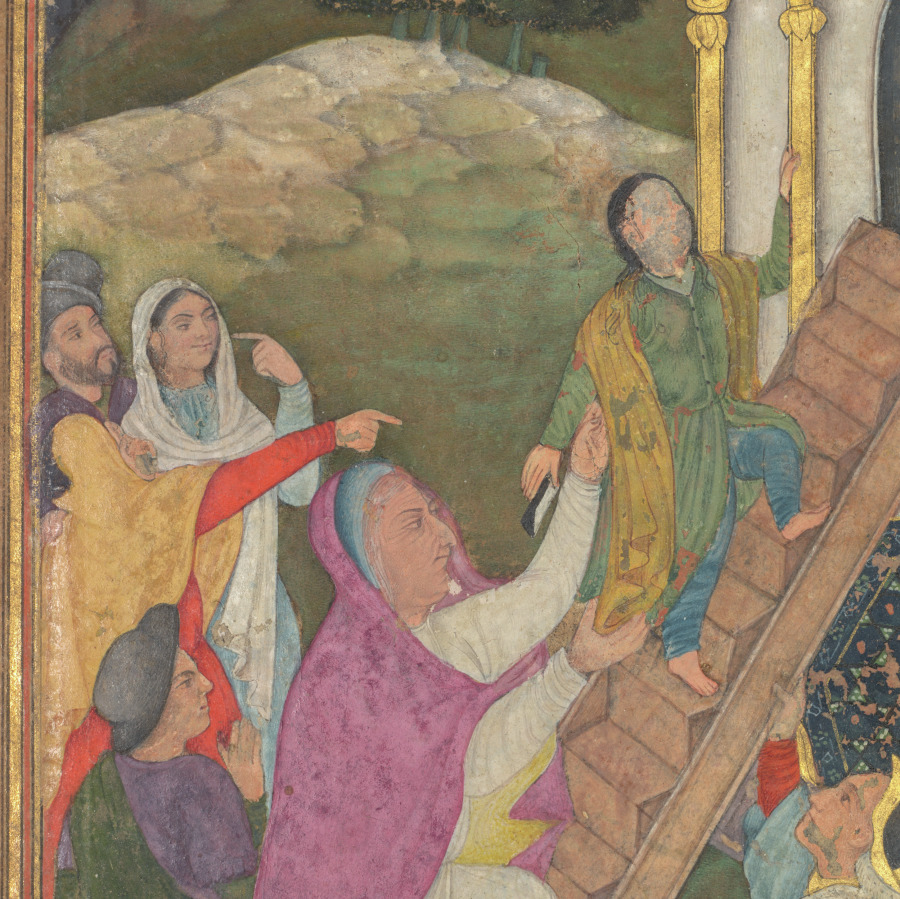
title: Mary ascends the stairs to the temple, from a Mirror of Holiness (Mir’at al-quds) of Father Jerome Xavier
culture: Mughal India, Allahabad, made for Prince Salim (1569–1627)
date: 1602–4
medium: Gum tempera, ink, color, and gold on paper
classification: Manuscript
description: Three-year-old Mary bounds up the stairs of the temple, eager to begin her education. Onlookers gesture in surprise. In the background the rocks have been cleverly shaded to look like faces—a Persian technique of visual double-entendre that the Mughals admired and adopted. This work is the second of the 27 surviving paintings made for this manuscript. The first, a scene of Mary’s birth, is in a private collection in Europe. Mary’s face had been painted with a fragile white paint, which has fallen off. Now only the underdrawing remains visible.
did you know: Mary’s instructor awaits her, book in hand, at the top of a temple of learning.